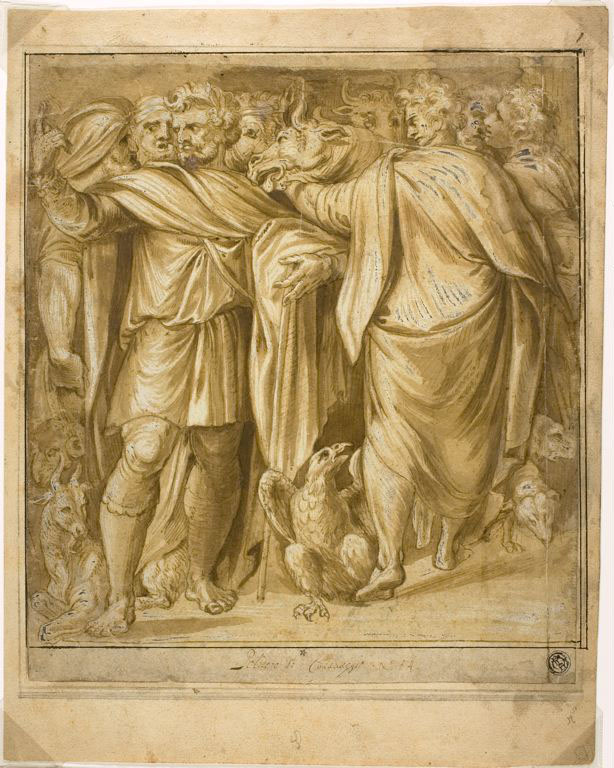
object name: Drawing and Watercolor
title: Sacrificial Scene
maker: After Polidoro Caldara, called Polidoro da Caravaggio; Italian, c. 1499-c. 1543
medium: Pen and brown ink, with brush and brown wash, heightened with lead white (partly oxidized), on ivory laid paper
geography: Italy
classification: ink with wash; drawings (visual works); prints and drawing